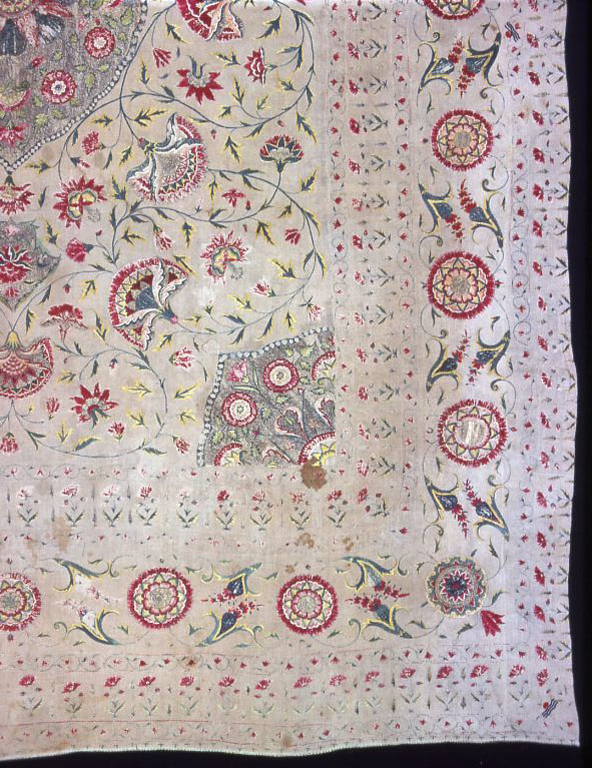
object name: Textile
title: Hanging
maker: Portugal or India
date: 18th century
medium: Linen, plain weave, in two thicknesses; cotton batting; quilted; embroidered in colored silk and metal strips wound around a silk fiber core in chain, satin, split, stem and couching stitches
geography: Portugal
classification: textile; weaving; needlework (visual works)